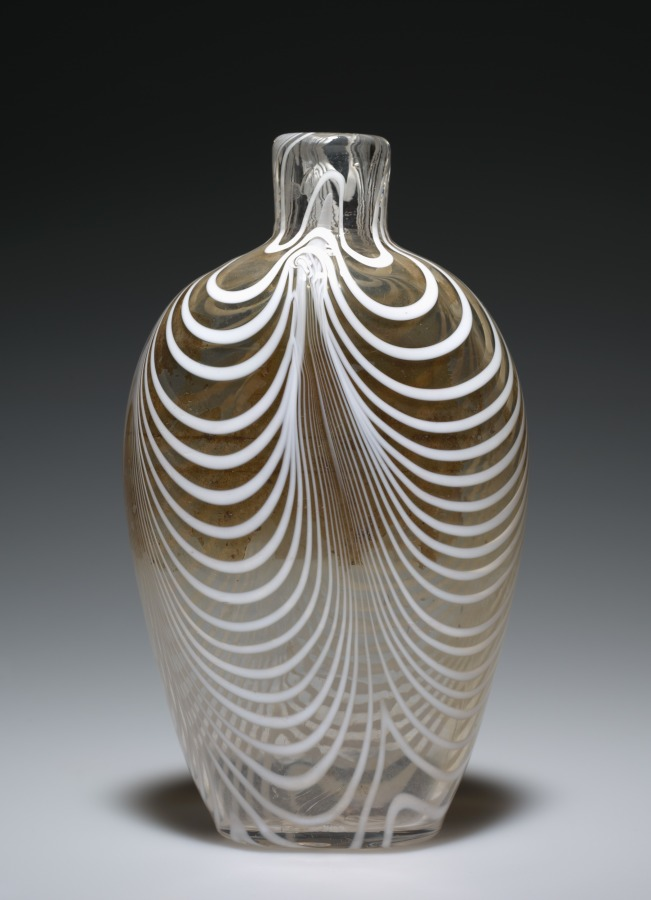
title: Flask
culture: America, South Jersey Type, 19th century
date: c. 1835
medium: glass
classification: Glass